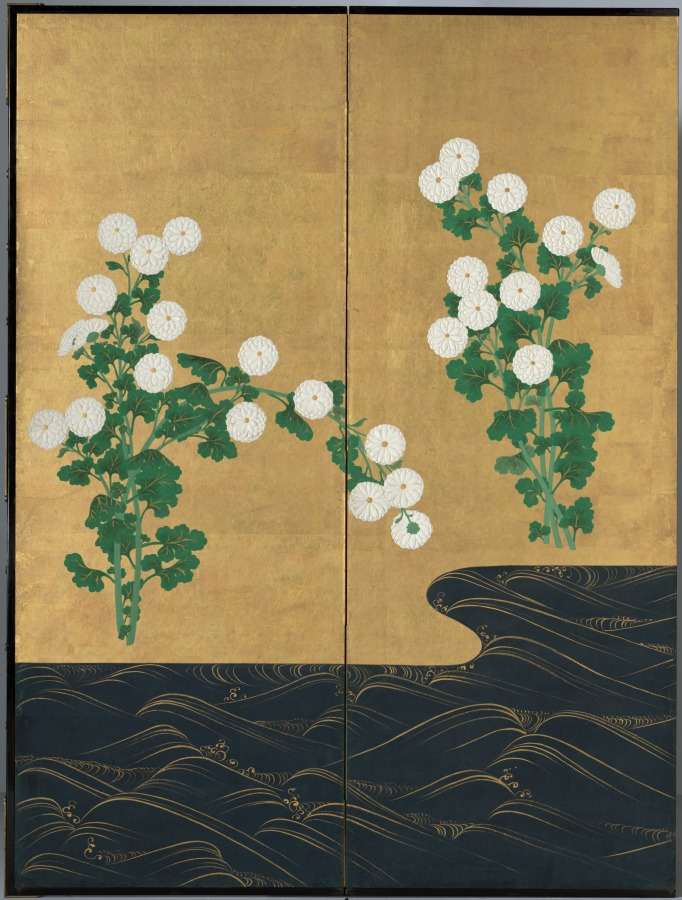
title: Chrysanthemums by a Stream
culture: Japan, Edo period (1615–1868)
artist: possibly by Ogata Kōrin (Japanese, 1658–1716)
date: c. 1715–30 or later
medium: One of a pair of six-panel folding screens; ink and color on gilded paper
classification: Painting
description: These screens recall a painting style so closely identified with Ogata Kōrin (1658–1716) that it is called Rinpa, or “Rin School,” after the ideograph “rin” in his name. The highly stylized background accentuates floral groupings that have been groomed so as to appear utterly artificial, like the synthetic arrangements available today. Kōrin's genius derived in large measure from natural phenomena painstakingly observed and then manipulated to create compositions of startling refinement and sparkling isolation. This process may have grown out of Kōrin's early immersion in the family textile business, a medium that encourages such dramatic distillations of form: the stream's gold-crested waves bring to mind traditional kimono robe designs of Kōrin's era. Works with the signature seen on this painting, including a style name, or persona suggested to Kōrin by his brother Kenzan (1663–1743), are sometimes considered to have been produced either in the last year of his life, when he was very ill, or after his death. In both scenarios, the lion’s share of the work would have been done by studio assistants, but little is truly known of his studio practice. Given the regularity of the gold waves on the stream, and the tension in the arrangement of the chrysanthemums, it is also possible that the screens were made in emulation of Kōrin's designs by a later artist.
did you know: The signature used on these screens may indicate paintings made in the last year of the artist's life, or works completed by his studio after his death.